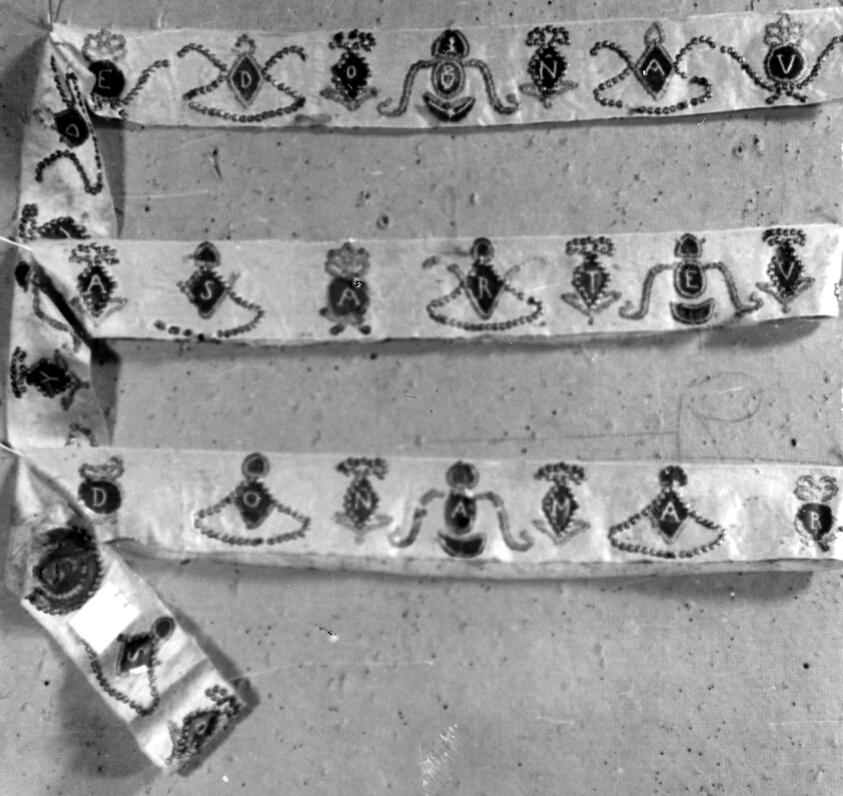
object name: Textile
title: Ribbon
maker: Spain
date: 19th century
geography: Spain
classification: textile; needlework (visual works)